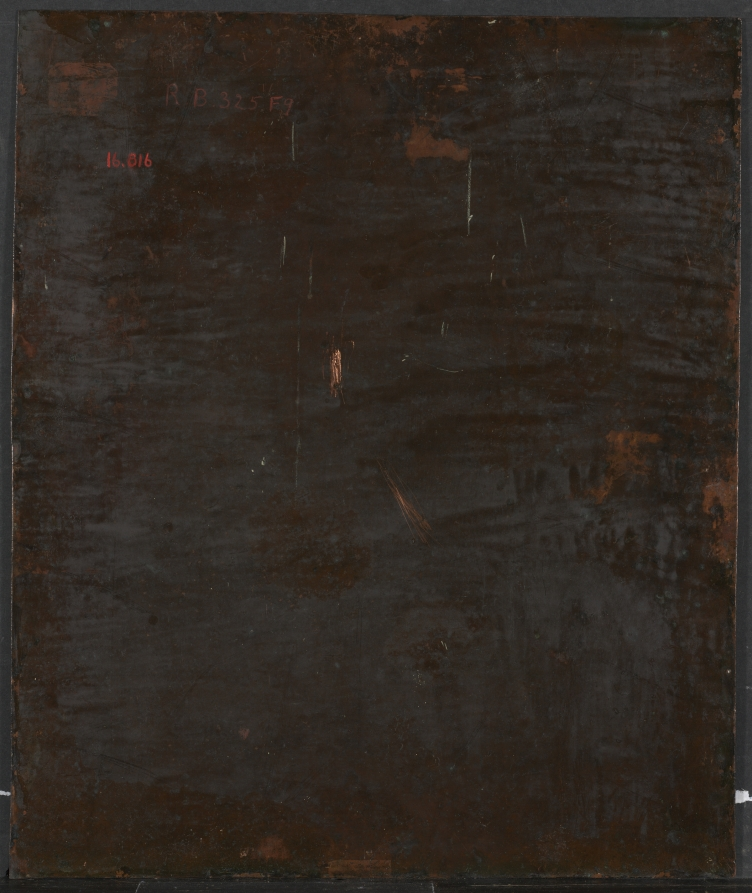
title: Preparation for the Crucifixion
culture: Northern Italy, early 17th century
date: early 1600s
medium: oil on copper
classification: Painting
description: Despite the religious subject, the scale and intricate detail indicate that this painting was not for a church setting. Instead, as an independent work of art, a collector would have admired its artistry and unusual combination of Italian and northern European traditions. Likewise, the subject’s novelty would have intrigued a sophisticated patron. Neither Christ’s disrobing before the Crucifixion nor the debate over the plaque identifying him as Jesus of Nazareth, King of the Jews, are common subjects in the Renaissance. Who made this work remains a mystery. The copper surface, complex composition, and atmospheric landscape imply a painter from north of the Alps, as does Christ’s sinuous body. However, the drapery, rich colors, and figures at lower right stem from Venetian Renaissance art.